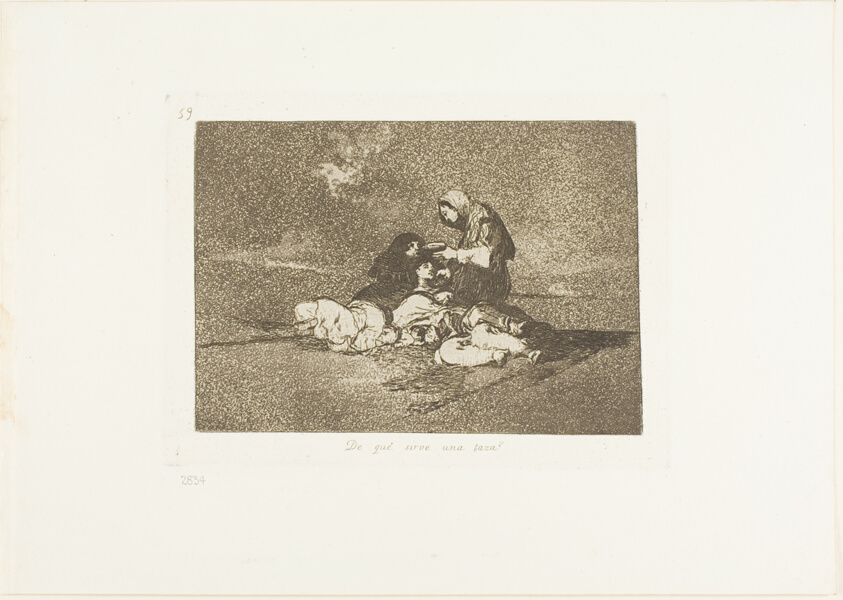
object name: Print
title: What is the Use of a Cup?, plate 59 from The Disasters of War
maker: Francisco José de Goya y Lucientes (Spanish, 1746-1828)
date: 1812/15, published 1863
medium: Etching, burnished aquatint and lavis on ivory wove paper with gilt edges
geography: Spain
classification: etching; print; prints and drawing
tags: war